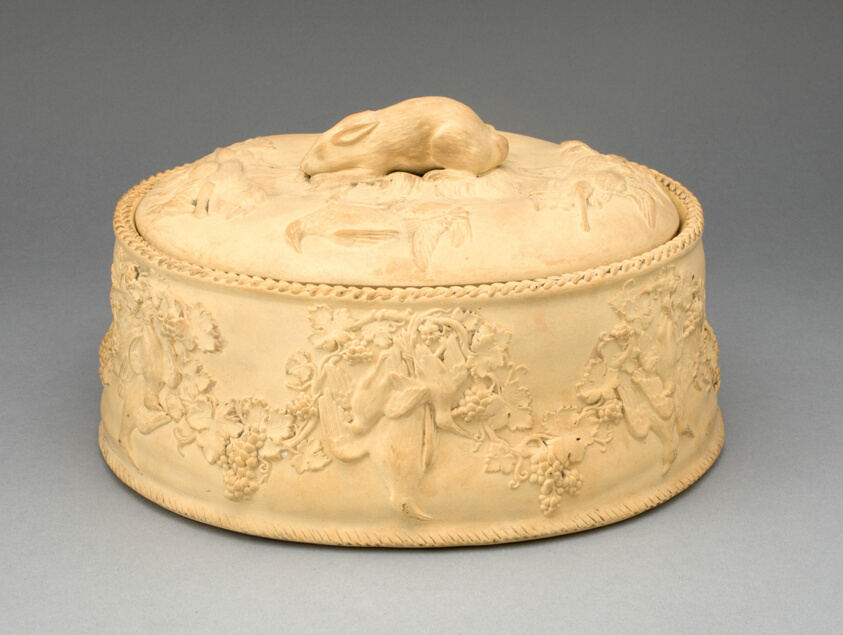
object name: Ceramics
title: Game Pie Tureen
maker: Wedgwood Manufactory (England, founded 1759)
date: c. 1850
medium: Stoneware (caneware)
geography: Burslem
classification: dish (vessel); tableware; stoneware; european decorative arts; ceramics